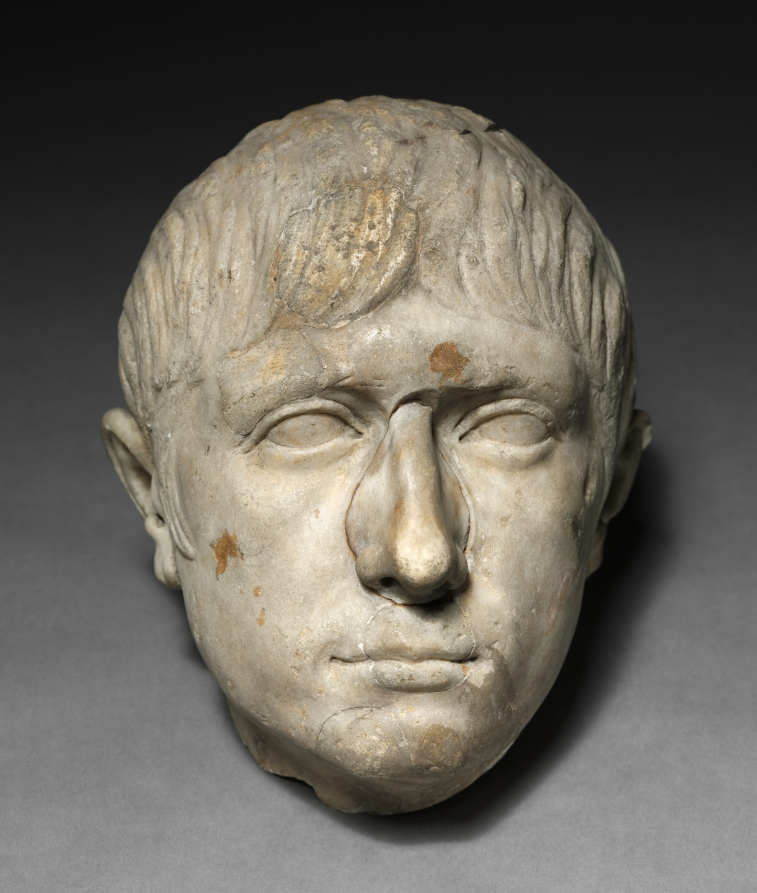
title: Bust of a Man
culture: Italy, Face: Roman, early 2nd century or later; Body: 16th century or later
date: Face: early 2nd century or later. Body: 1500s or later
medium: marble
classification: Sculpture